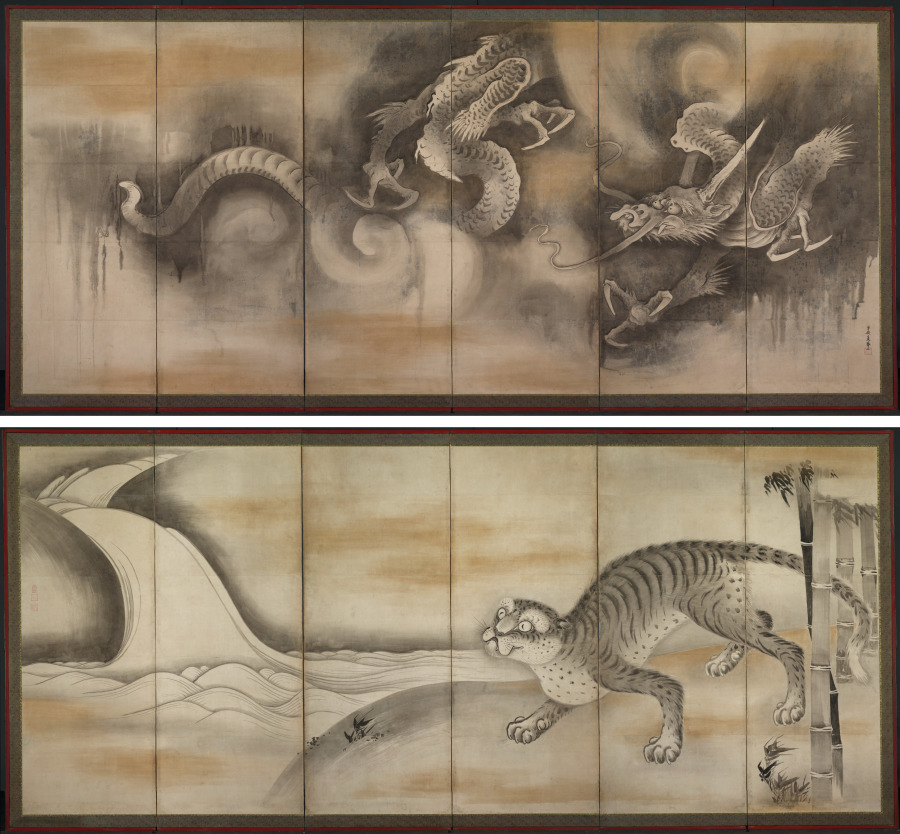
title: Dragon and Tiger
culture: Japan, Edo period (1615–1868)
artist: attributed to Soga Nichokuan (Japanese)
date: early to mid-1600s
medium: pair of six-panel folding screens; ink, slight color, gold, and silver on paper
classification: Painting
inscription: Signed: Soga Chokuan II (Soga Chokuan ni). Sealed: Hoin (right), Soga Chokuan Hoin (three seals at left)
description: A tiger looks upon a waterfall as it prowls out of a bamboo grove, and a dragon dives through clouds on the right. Tiger and dragon are traditional symbols of the balancing forces in the world, yin (the feminine aspect) and yang (the masculine aspect). This painting has a signature and seals, identifying it as a work by Soga Nichokuan, a painter thought to be from Sakai (near Osaka), and known primarily for his representations of hawk-eagles (kumataka).